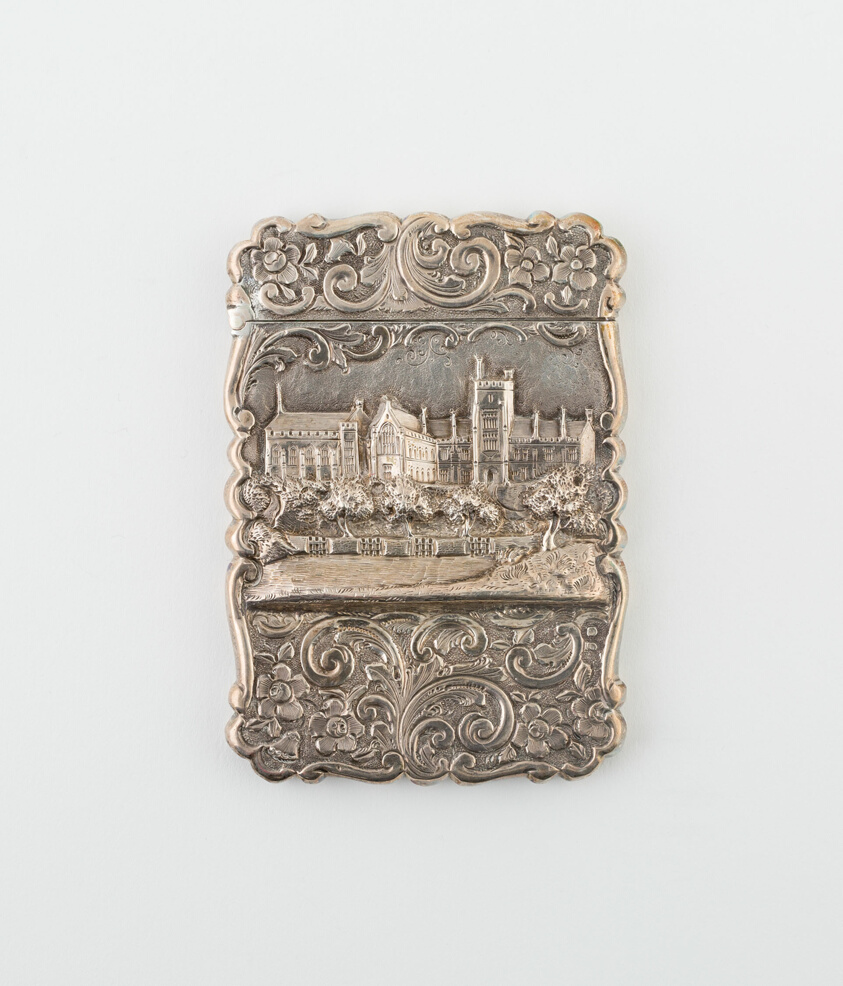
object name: Metalwork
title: Card Case with View of Oxford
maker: Marked F. M.; Birmingham, England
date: 1860/61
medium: Silver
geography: Birmingham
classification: container for personal use; box; european decorative arts; metalwork; silver; decorative object/ornament